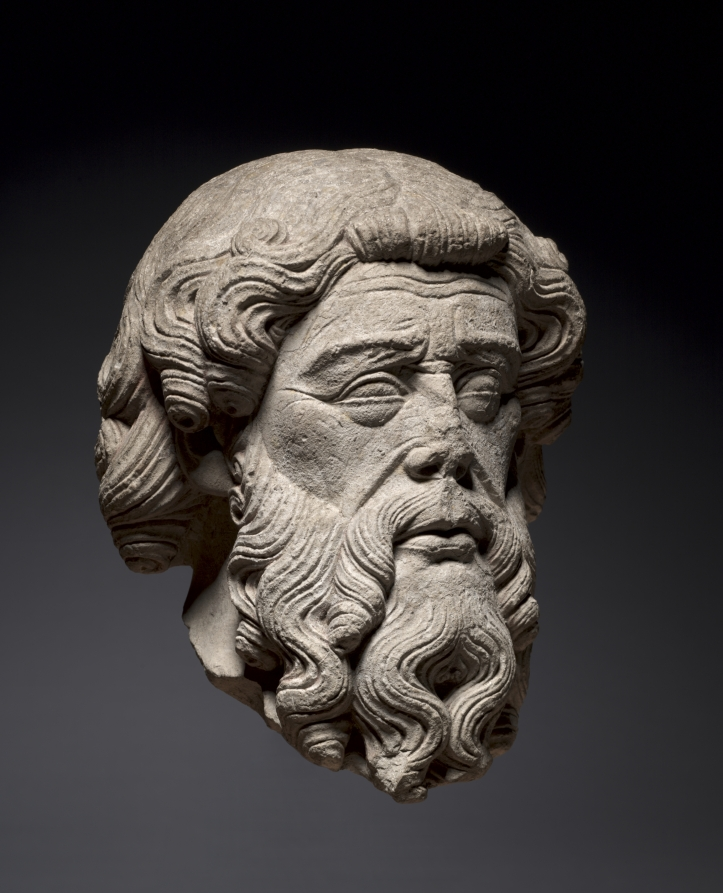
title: Head of an Apostle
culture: Southwestern France, Toulouse?, 14th century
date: c. 1325–1350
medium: limestone, with traces of polychromy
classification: Sculpture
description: This detached head with deeply incised hair was likely that of a large, nearly life-sized figure of an apostle. It would have originally stood more than 6 feet in height and was gilded and painted. The head was formerly affixed to a halo carved from the same block of stone, and the head would have been slightly angled downward. Though its original context is unknown, the style is generally suggestive of sculptural programs in Toulouse during the early 1300s.